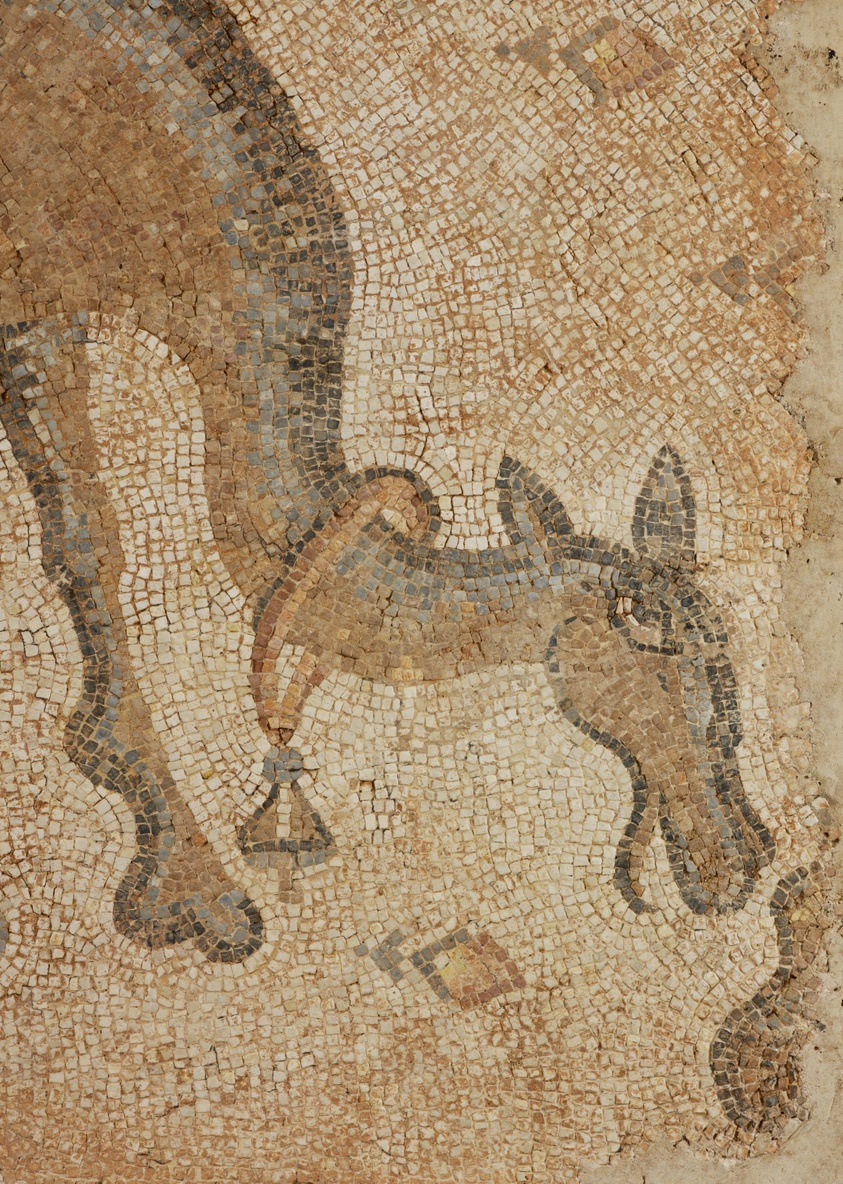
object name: Architectural fragment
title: Mosaic Fragment with Grazing Camel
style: byzantine, ancient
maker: Byzantine; Eastern Mediterranean, probably Syria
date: 5th century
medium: Stone in mortar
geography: Byzantine Empire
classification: architectural fragment; mosaic; ancient art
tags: animals